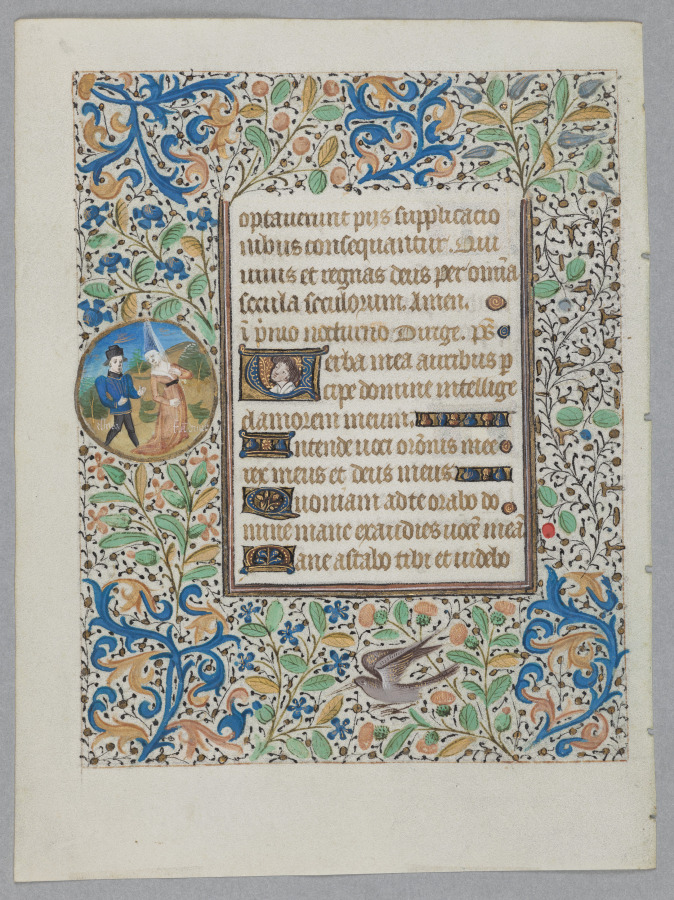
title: Leaf from a Book of Hours: Office of the Dead with Psalm 5 (verso)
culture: France, Paris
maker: circle of Coëtivy Master (French)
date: c. 1460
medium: Ink, tempera and gold on vellum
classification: Manuscript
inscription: optaverunt, piis supplication- nibus consequantur. Qui vivis et regnas deus per omnia saecula saeculorum. Amen. Dirige Verba mea auribus p- ercipe Domine intellige clamorem meum. Intende voci orationis meae: Rex meus, et Deus meus. Quoniam ad te orabo Do- mine: mane exaudies vocem meam. Mane astabo tibi, et videbo…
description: The leaf shows the life of St Alexis, a monk of the 300s. His veneration became popular in France since the 1100s when the French poem la Vie de saint Alexis was written. This text is regarded as one of the earliest examples in romance language written in French and not in Latin.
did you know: St. Alexis is depicted here as a courtly person of the 1400s to bring him close to the reader.